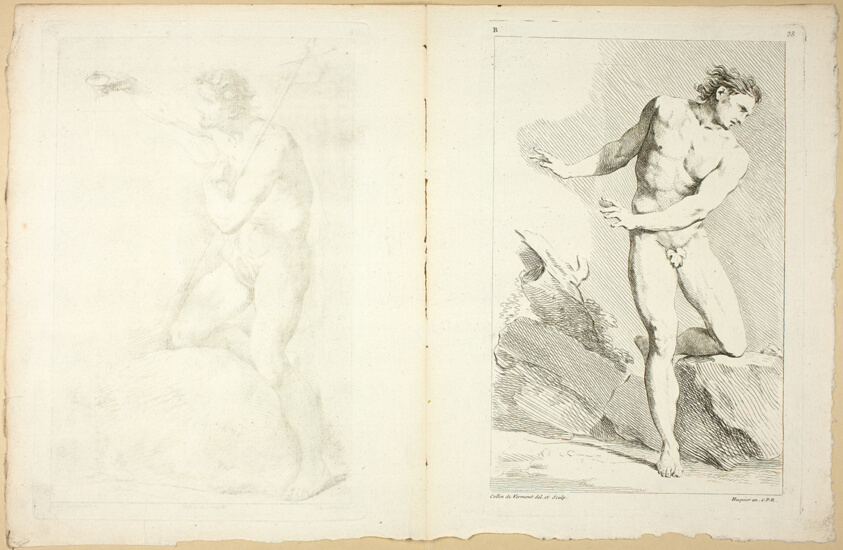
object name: Print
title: Page 38 and Page 39, from Seconde Livre de Figures d'Academies Gravées en Partie par les Professeurs de l’Académie Royale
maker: Collin de Vermont (French, 1693-1761); Jean-Baptiste Perronneau (French, 1715-1783); after Charles-Joseph Natoire (French, 1700-1777); printed by Gabriel Huquier (French, 1695-1772); published by Charles-Antoine Jombert (French, 1712-1784) (French, 18th century)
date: published 1745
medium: Etching (recto and verso) on ivory laid paper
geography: France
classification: etching; print; prints and drawing